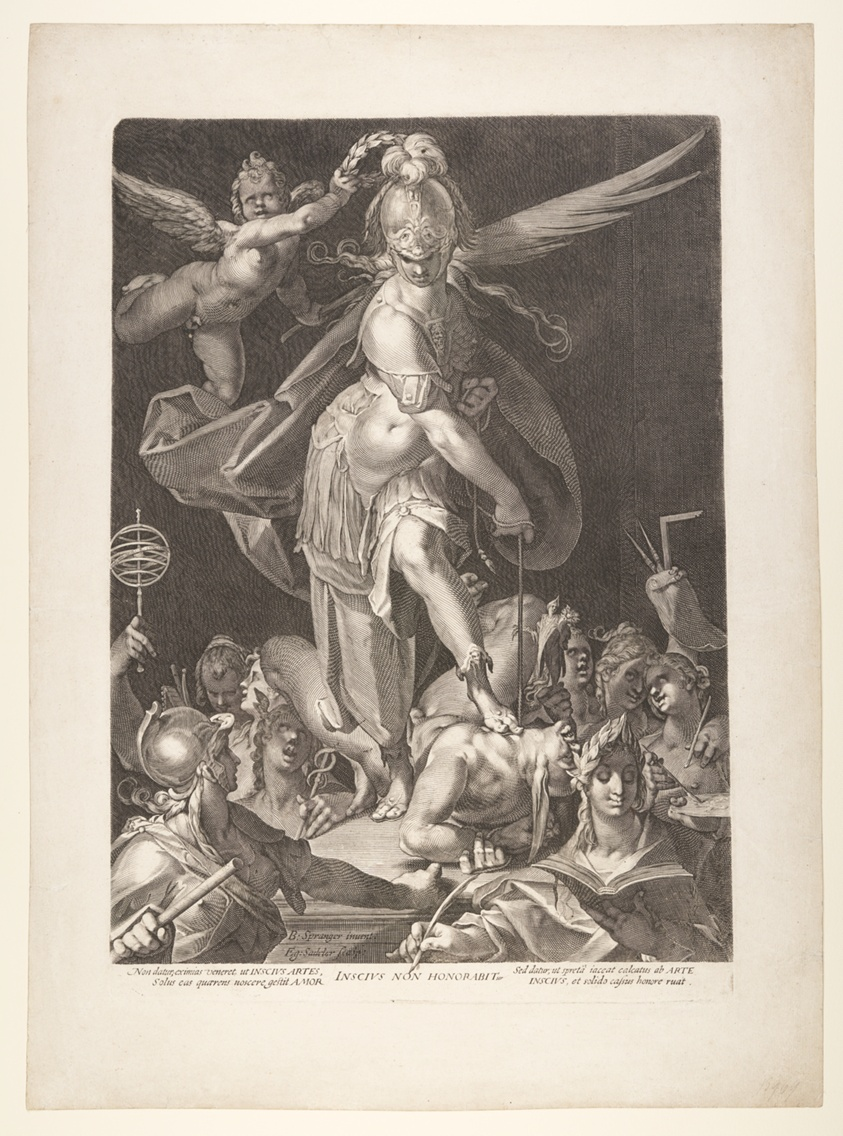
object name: Print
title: The Triumph of Wisdom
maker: Aegidius Sadeler II (Flemish, c. 1570–1629); after Bartholomeus Spranger (Flemish, 1546–1611)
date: c. 1600-10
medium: Engraving on ivory laid paper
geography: Flanders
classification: engraving; paper; print; prints and drawing